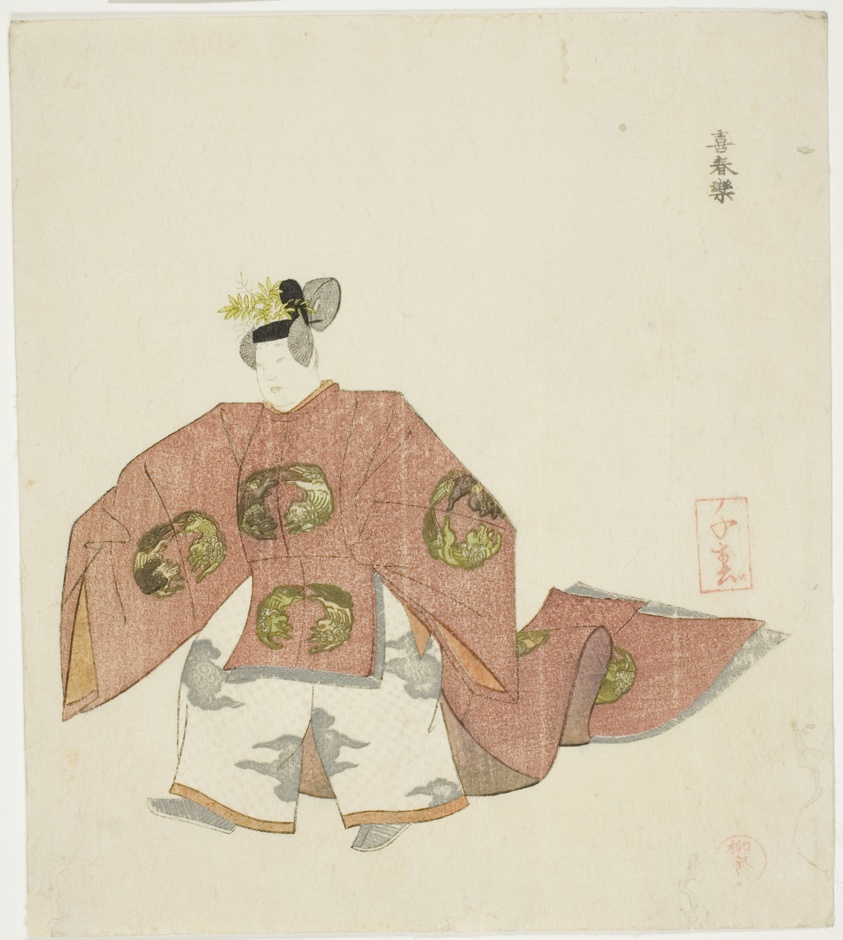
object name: Print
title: Kishunraku, from an untitled series of No plays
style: Japanese (culture or style)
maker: Takashima Chiharu (Japanese, 1777-1859)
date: 1823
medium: Color woodblock print; shikishiban, surimono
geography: Japan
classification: woodblock print; print; asian art